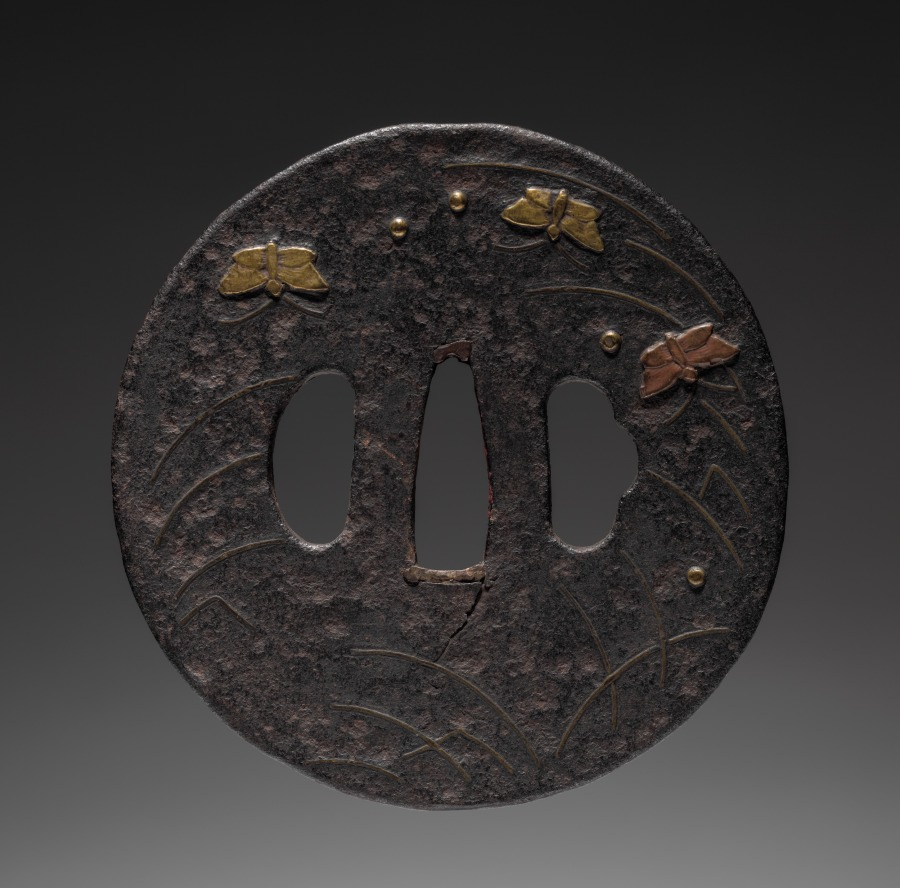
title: Sword Guard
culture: Japan, Edo period (1615–1868)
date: 1615–1868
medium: iron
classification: Arms and Armor